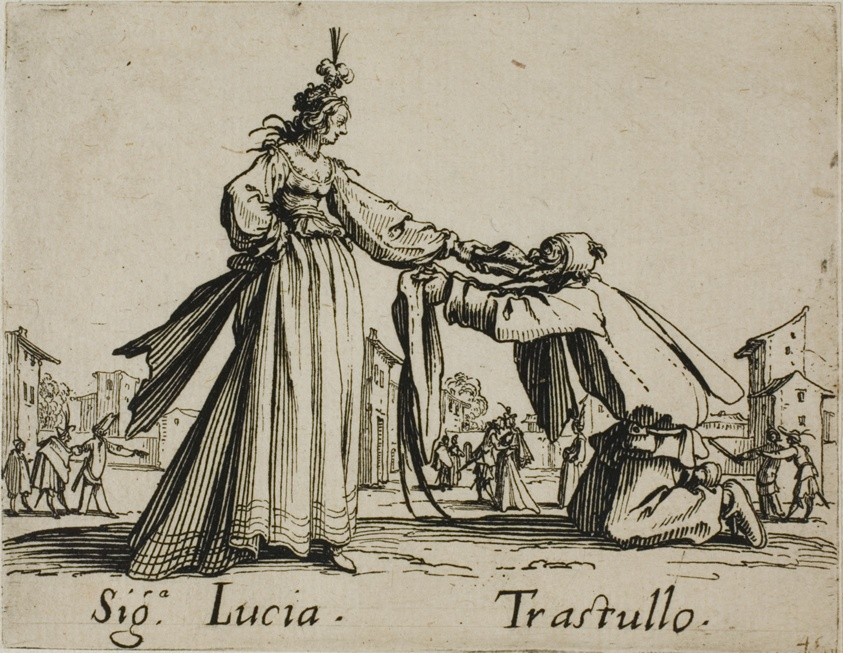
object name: Print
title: Signora Lucia - Trastullo, plate 21 from Balli di Sfessania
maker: Jacques Callot (French, 1592-1635)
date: c. 1622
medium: Etching and engraving on paper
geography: France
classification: etching; print; prints and drawing